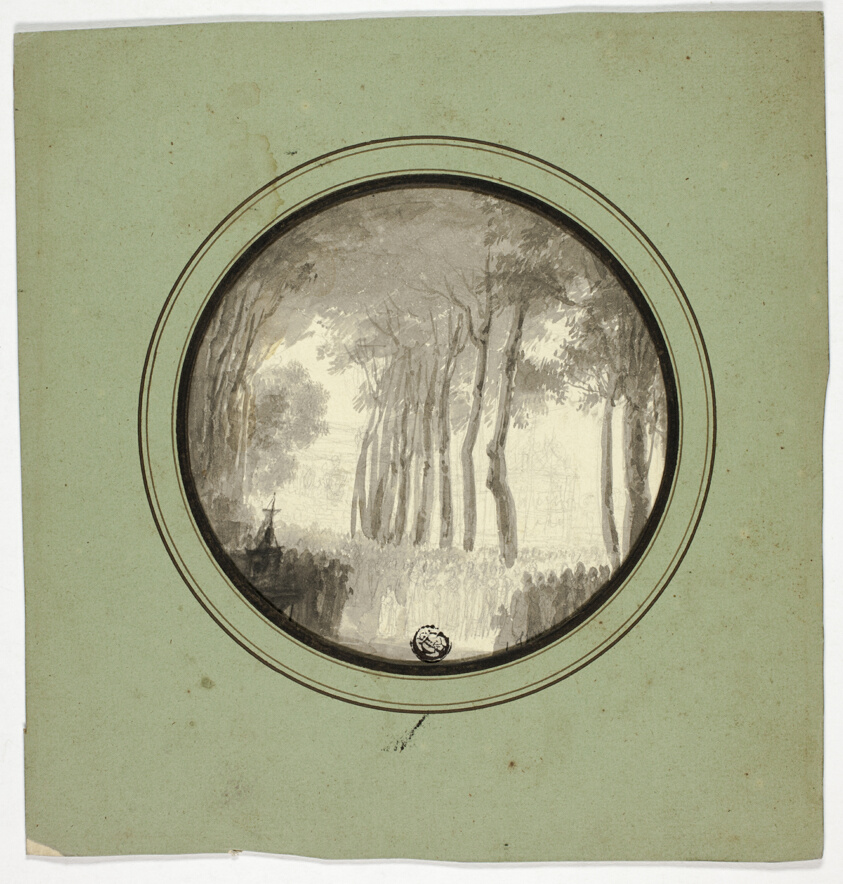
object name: Drawing and Watercolor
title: Religious Procession Under Trees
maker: Unknown Artist; French, 18th century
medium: Brush and gray wash, with graphite, on cream wove paper, tipped on cream laminate card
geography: France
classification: ink or chalk wash; drawings (visual works); prints and drawing